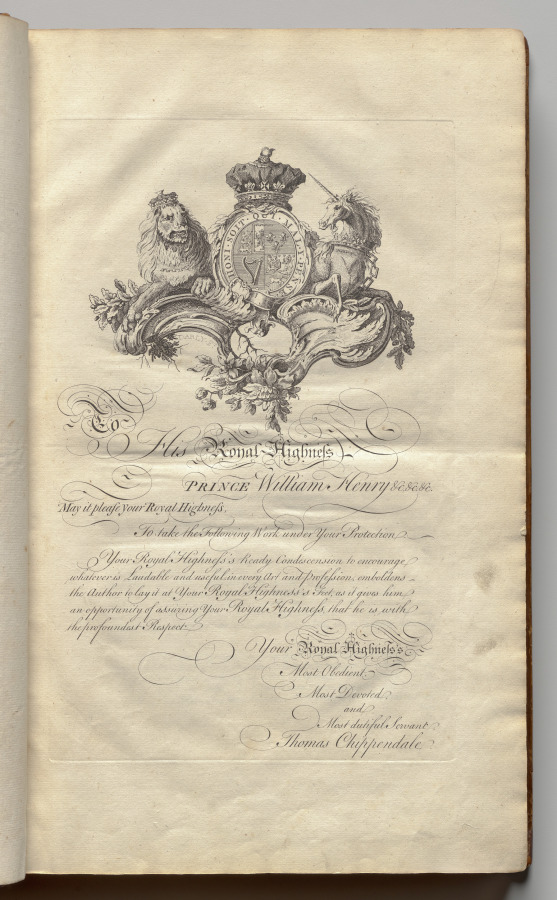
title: The Gentleman and Cabinet-Maker's Director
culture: Britain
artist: Thomas Chippendale (British, 1718–1779)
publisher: T. Becket & P. A. de Hondt (British)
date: 1762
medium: Paper, leather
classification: Bound Volume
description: Through his designs for furniture and architectural elements, Thomas Chippendale became one of the most influential tastemakers of the 1700s. He published three editions of The Gentleman and Cabinet-Maker’s Director (1754, 1755, and 1762), which sold widely in Britain, Ireland, and America. This rare French version of the third edition demonstrates his effort to spread his designs for both naturalistic and neoclassical decoration even wider across Europe.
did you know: Fewer than fifteen copies, including this one, of the French edition of Thomas Chippendale’s famous book of designs, are known to exist.